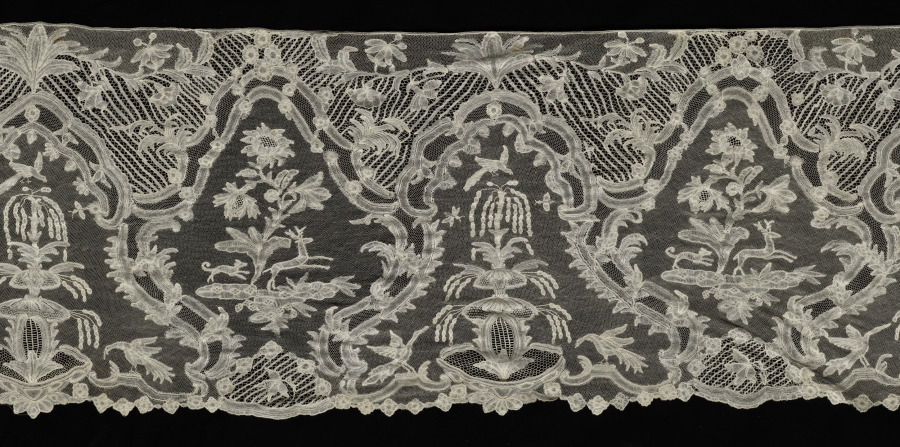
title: Lace Flounce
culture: Belgium, Brabant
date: 1700s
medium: Linen: bobbin lace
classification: Lace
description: This piece of lace depicts fountains alternating with a deer and a dog by a flowering tree.